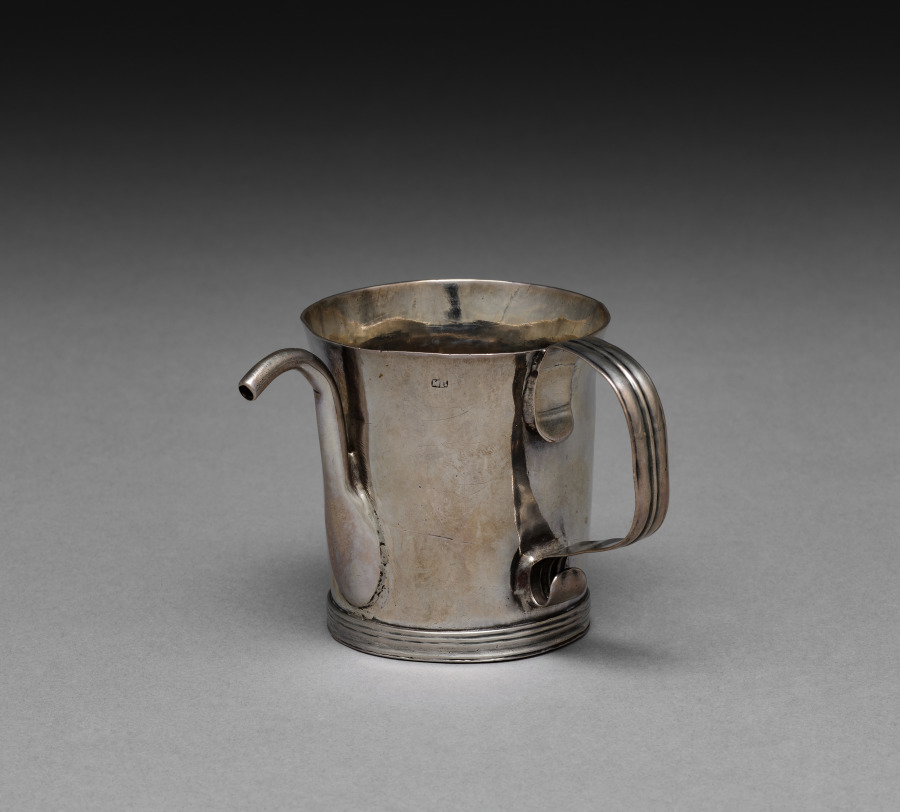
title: Spout Cup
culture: America, Massachusetts, Barnstable, 18th century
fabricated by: Moody Russell (American, 1694–1761)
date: c. 1720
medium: silver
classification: Silver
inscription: engraved ""TRA/JDA" and "THA/HGA" in bright-cut script on side, and "F" over "IM" on bottom.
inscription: Stamped on side: "MR".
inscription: Engraved underside: "F".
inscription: Scratched underside: multiple illegible words